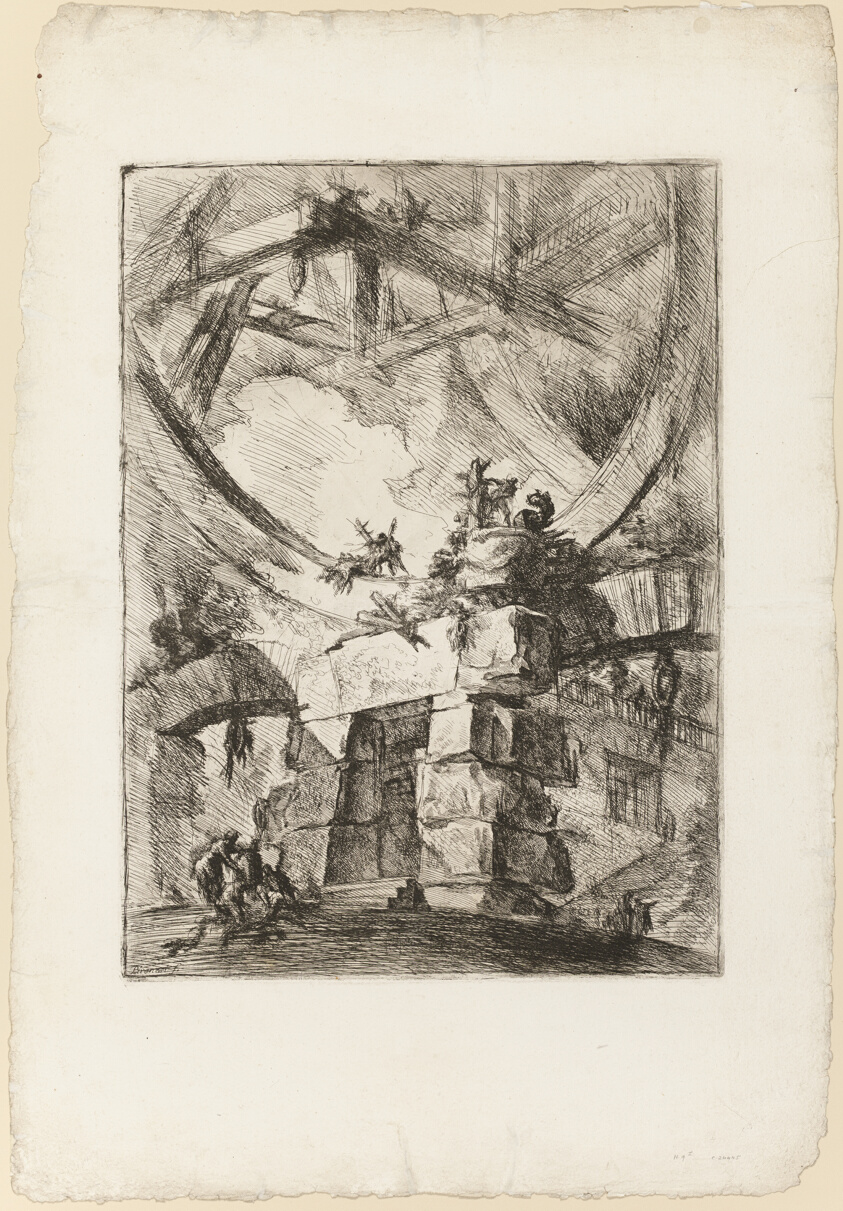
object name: Print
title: The Carceri, plate 9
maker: Giovanni Battista Piranesi (Italian, 1720-1778)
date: 1748/50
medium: Etching and engraving on heavy ivory laid paper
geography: Italy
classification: etching; print; prints and drawing